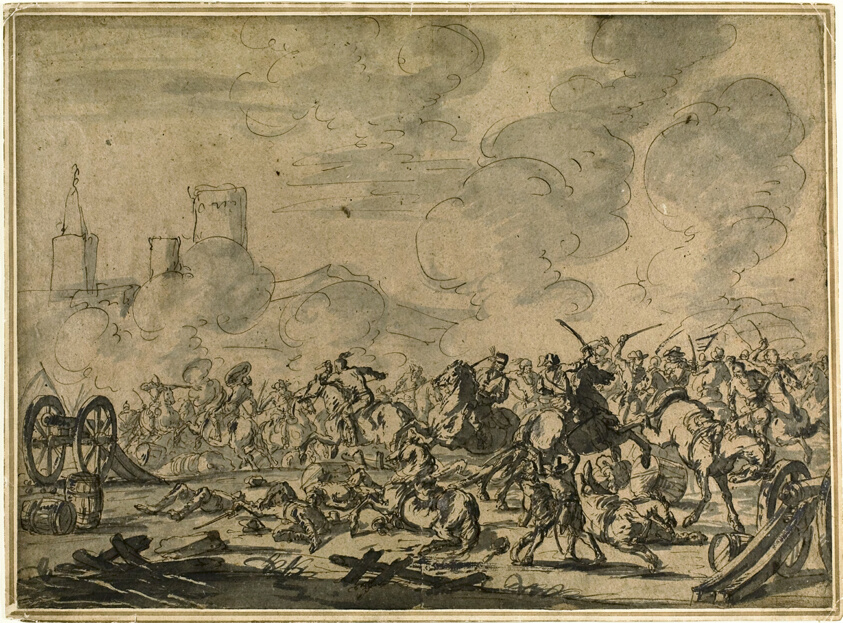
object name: Drawing and Watercolor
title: Cavalry and Artillery Battle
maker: Style of Jacques Courtois; French, c. 1729-c. 1767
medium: Pen and brown ink, and brush and black and gray wash, heightened with lead white (discolored), on tan laid paper, laid down on cream laid card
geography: France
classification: pen and ink drawings; drawings (visual works); prints and drawing